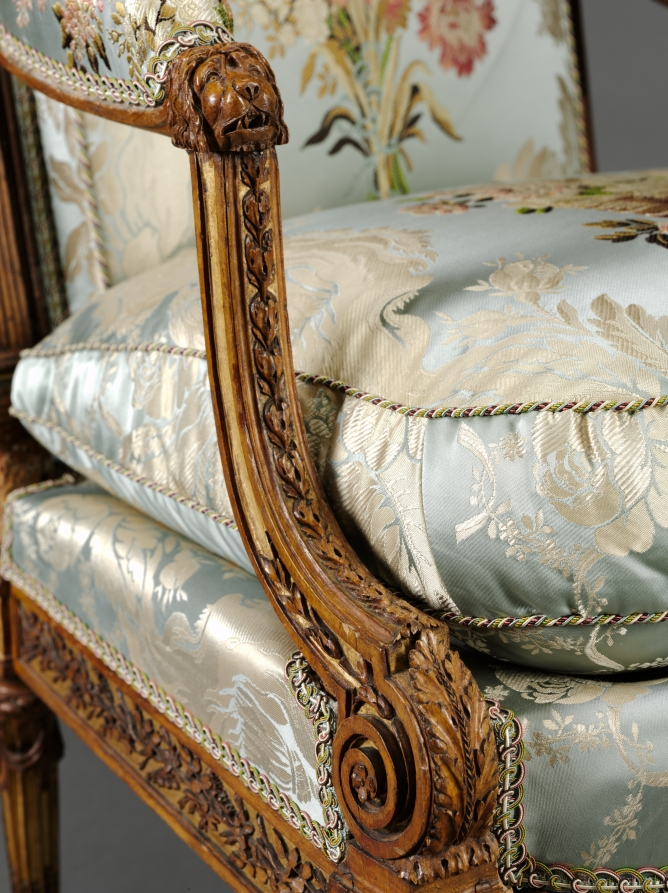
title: Armchair (Fauteuil) (2 of 2)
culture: France, 18th century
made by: Nicolas-Denis Delaisement (French)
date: c. 1785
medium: boxwood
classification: Furniture and woodwork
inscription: signed on front and back of frame of seat underneath: Delaisement with inverted "s."